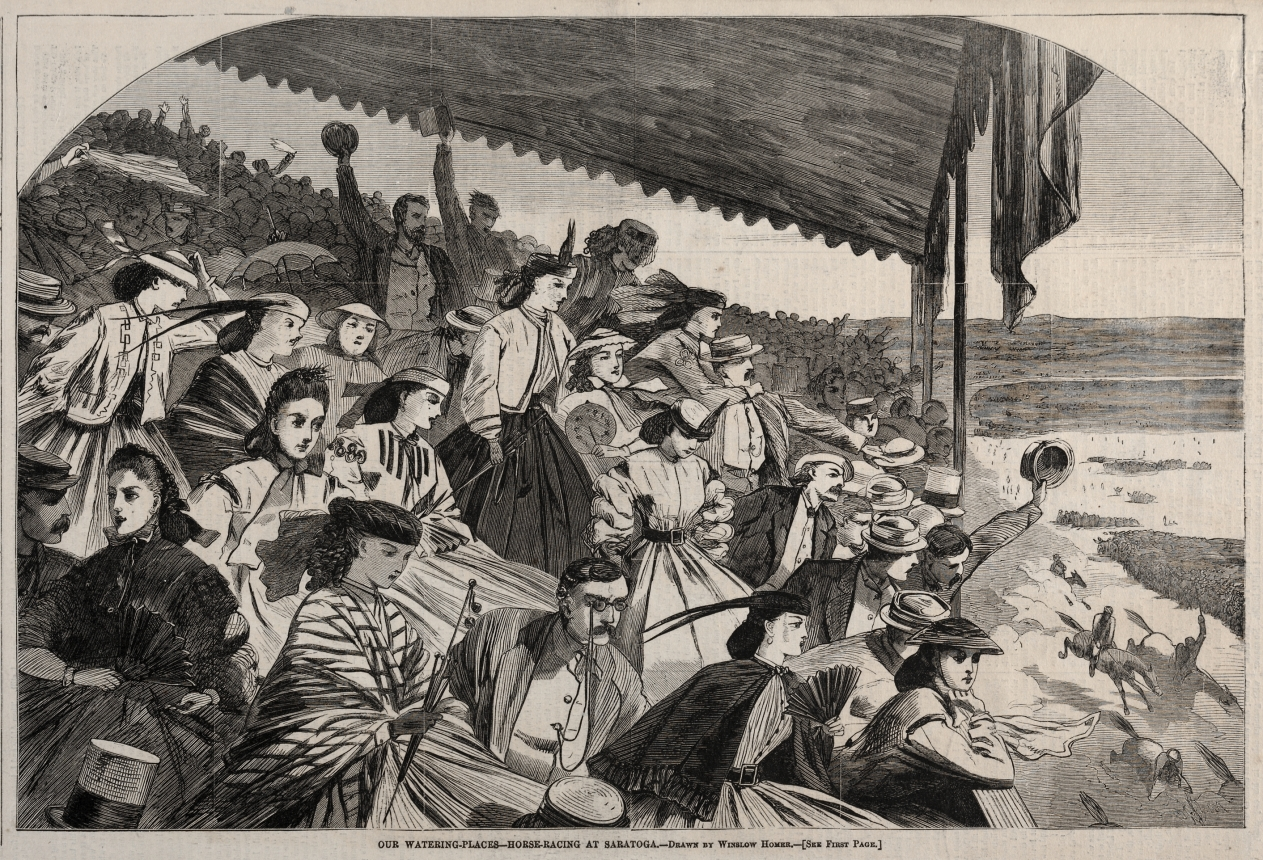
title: Our Watering Places - Horse Racing at Saratoga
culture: America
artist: Winslow Homer (American, 1836–1910)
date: 1865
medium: wood engraving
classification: Print